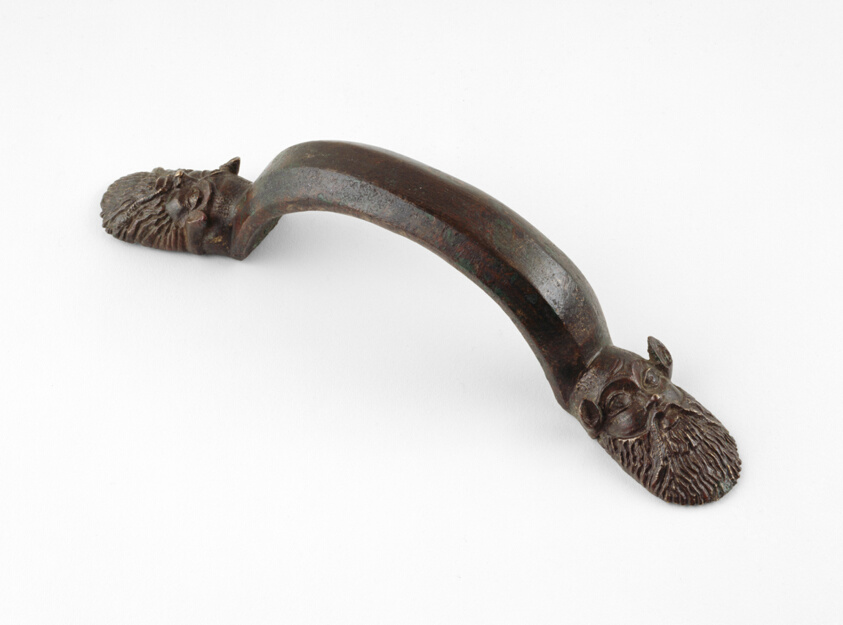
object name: Decorative Arts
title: Handle from a Hydria (Water Jar) or a Stamnos (Mixing Jar)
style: Classical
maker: Etruscan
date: 5th century BCE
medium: Bronze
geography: Ancient Greece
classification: bronze; decorative arts